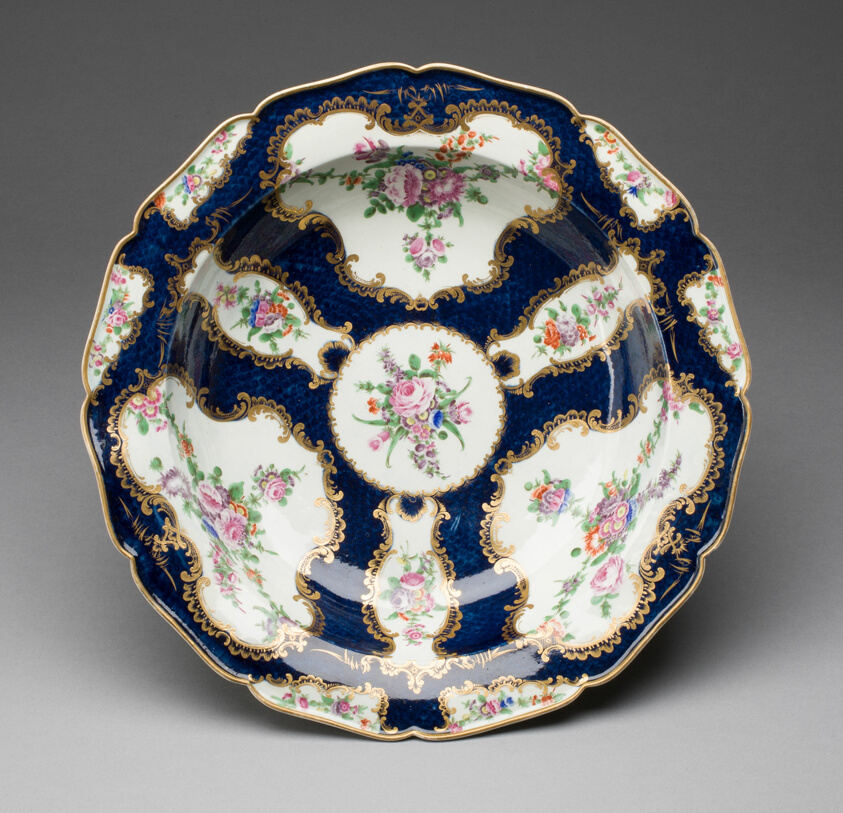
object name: Ceramics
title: Basin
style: Rococo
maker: Worcester Porcelain Factory (Warmstry House Period, 1751–1783); Worcester, England, founded 1751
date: c. 1770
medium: Soft-paste porcelain, underglaze blue, polychrome enamels and gilding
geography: Worcester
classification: ceramics; porcelain; european decorative arts